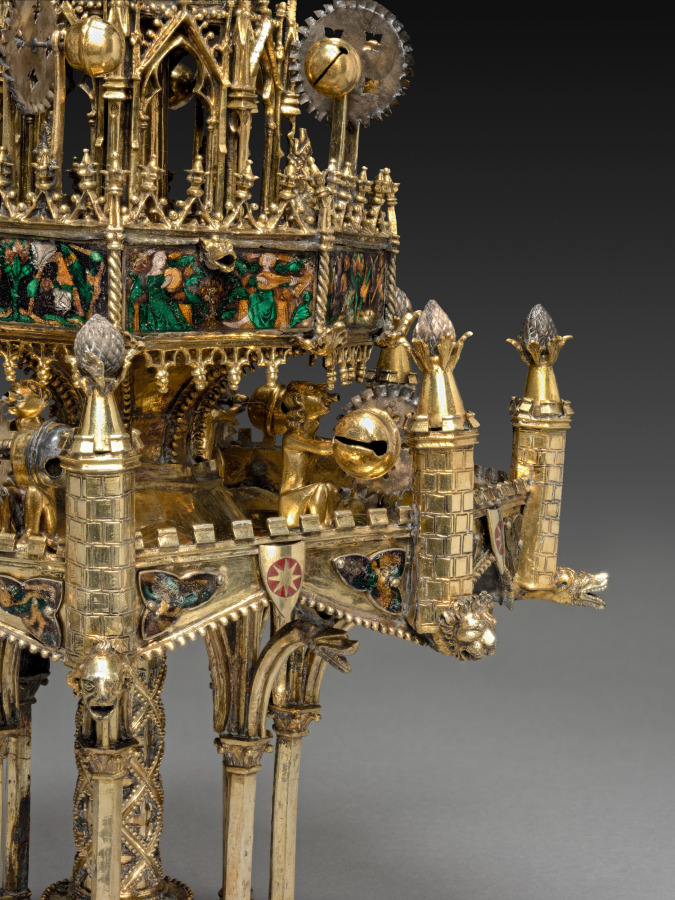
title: Table Fountain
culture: France, Paris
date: c. 1320–40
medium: gilt-silver and translucent enamels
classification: Metalwork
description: Conceptually and stylistically, this object is beyond all else a piece of Gothic architecture in miniature with vaults, pinnacles, columns, and traceried arches. Though the artist who created it is unknown, he was unquestionably inspired by the great Gothic buildings of his time. The table fountain is a three-tiered assembly combining cast elements with bent sheets of gilt-silver. To these have been attached a series of enamel plaques representing grotesque figures, some of which play musical instruments. Water wheels and bells were added to capture motion and sound. The rich detail, precious materials, and involved ornamentation of this deluxe object suggest it would have been expensive to produce and highly treasured by its original owner, someone of high status, and would have been deployed as an object of spectacle. This is the most complete example of its type known to survive from the Middle Ages. Medieval inventories reveal that small fountains like this, often taking various forms, and generally made from precious metals, once existed in large numbers, thus making the Cleveland table fountain an extremely rare object.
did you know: This fountain with its minute architectural details and finely made enamel plaques displayed the wealth and refinement of the owner as it entertained his guests. Imagine hearing the ringing of the tiny bells when this fountain was in use.